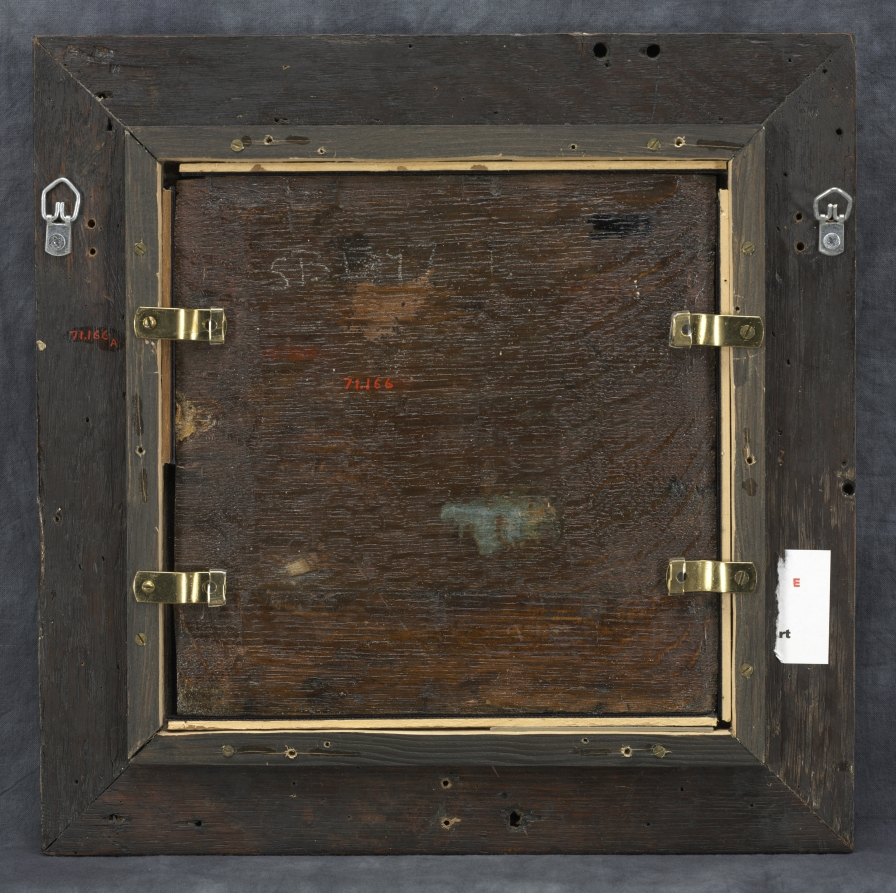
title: Terminus, the Device of Erasmus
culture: Germany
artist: Hans Holbein the Younger (German, active England and Switzerland, 1497/98–1543)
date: c. 1532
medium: oil on wood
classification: Painting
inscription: Inscribed in the middle: "CONCEDO NVLLI. [lower right: TERMI / NVS"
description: In the spirit of the Italian Renaissance, Erasmus of Rotterdam (c. 1466–1536), the celebrated Dutch humanist and scholar, embraced ancient Greek and Roman literature and incorporated much of its moral and ethical messages into his own work. Holbein here conflates Erasmus’s features with Terminus, the Roman god of boundaries, who defied Jupiter by maintaining his position atop Capitoline Hill. Erasmus adopted Terminus, along with the motto concedo nulli (I concede to no one), as a personal symbol for devotion and steadfastness.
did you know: Tree ring analysis helped determine the date of this painting.